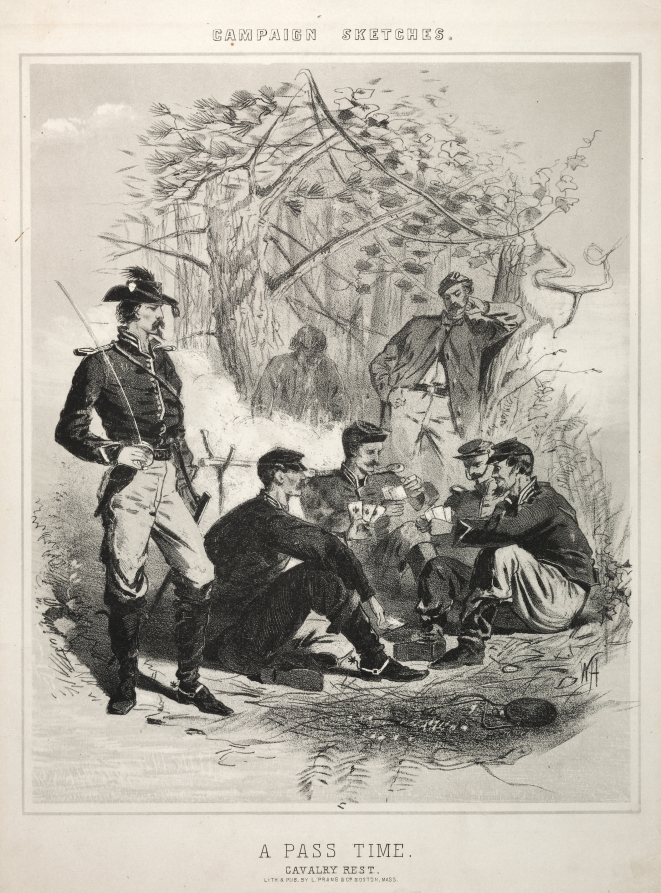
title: Campaign Sketches: A Pass Time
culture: America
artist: Winslow Homer (American, 1836–1910)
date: 1863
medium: lithograph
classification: Print